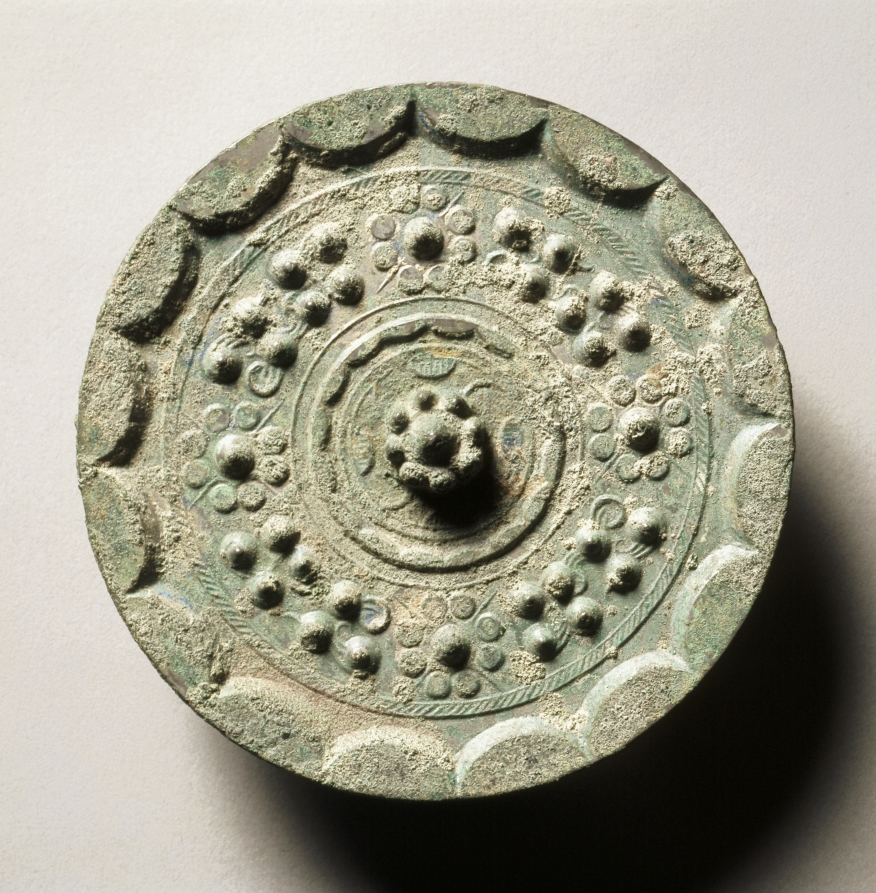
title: Mirror with Clouds and Nebulae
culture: China, Western Han dynasty (206 BCE–8 CE)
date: late 300s BCE–50 CE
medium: bronze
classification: Metalwork